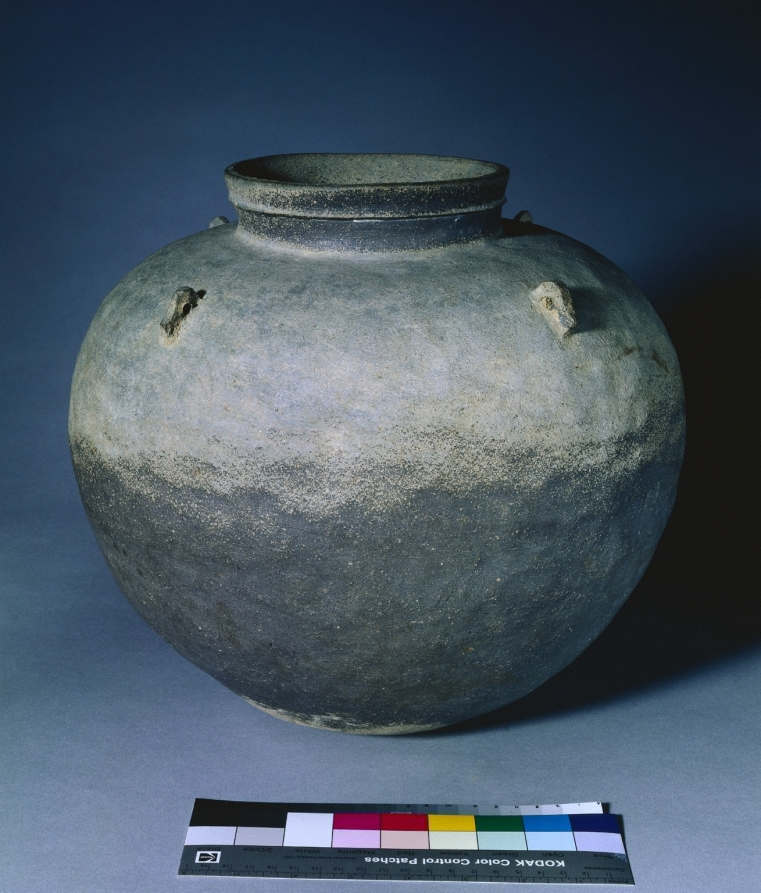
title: Jar with Four Lugs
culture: Korea, Three Kingdoms period (57 BCE–668 CE)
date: 500s–600s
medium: stoneware with traces of ash glaze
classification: Ceramic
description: This storage jar comes from the Paekche kilns. The matte gray surface of ash deposits on the upper body provides an appealing decoration. Paekche potters often employed the pounding technique (tanal in Korean) to treat the surface, a method to strengthen the clay body.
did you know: Closed kilns built on hillsides became widely used for producing this type of pottery vessel in Korea during the Three Kingdoms period.